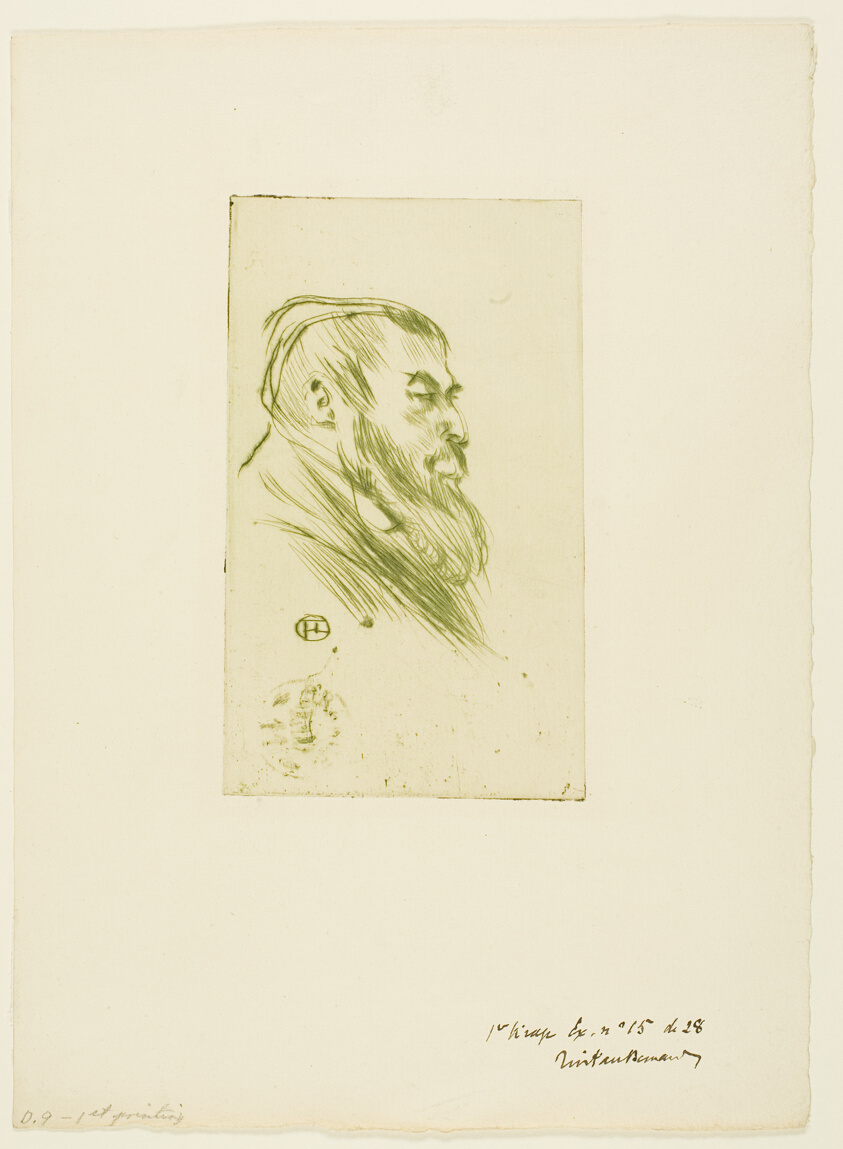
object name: Print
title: Tristan Bernard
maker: Henri de Toulouse-Lautrec (French, 1864-1901)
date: 1898, printed and published 1920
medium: Drypoint from a zinc plate in olive green on cream laid paper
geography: France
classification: drypoint; print; prints and drawing